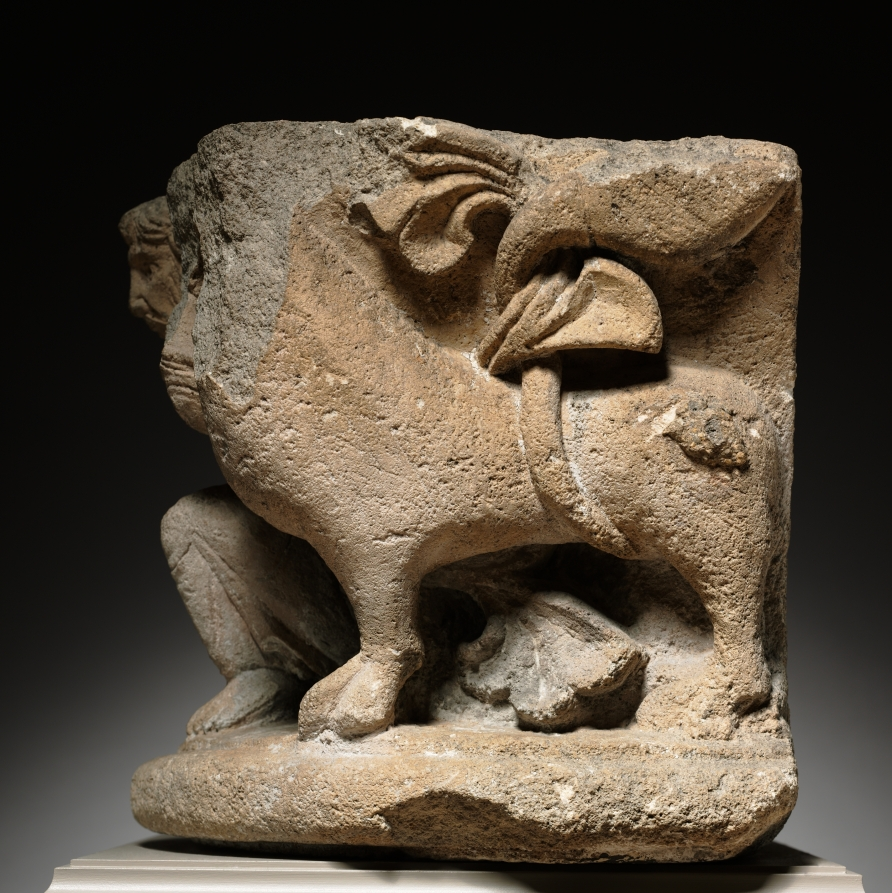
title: Engaged Capital with a Supporting (Caryatidal) Figure Flanked by Lions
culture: Western France, Vendée or Angoulême?, 12th century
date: c. 1125–1150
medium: limestone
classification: Sculpture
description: This sculpture is an excellent example of the Romanesque sculptor’s ability to accommodate his subject to the format of the capital. Much of the artistic quality of this work derives from the skillful contrast and balance of rounded solids, deep voids, and shallow prismatic hollows. It also illustrates the love of fanciful subject matter in largely religious contexts. A capital is essentially the top element of a column, usually carved, that acts as a mediator between the column and the load it supports. In this way, the subject of this capital serves as a metaphor.